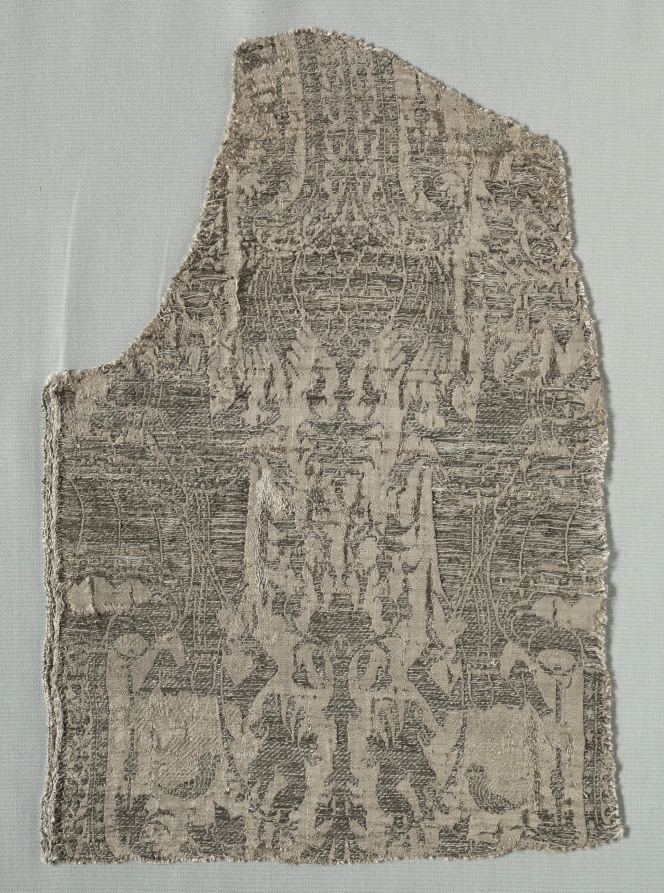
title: Silk Fragment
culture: Italy, last quarter of 14th century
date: 1375–1399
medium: lampas weave, silk and gold thread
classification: Textile